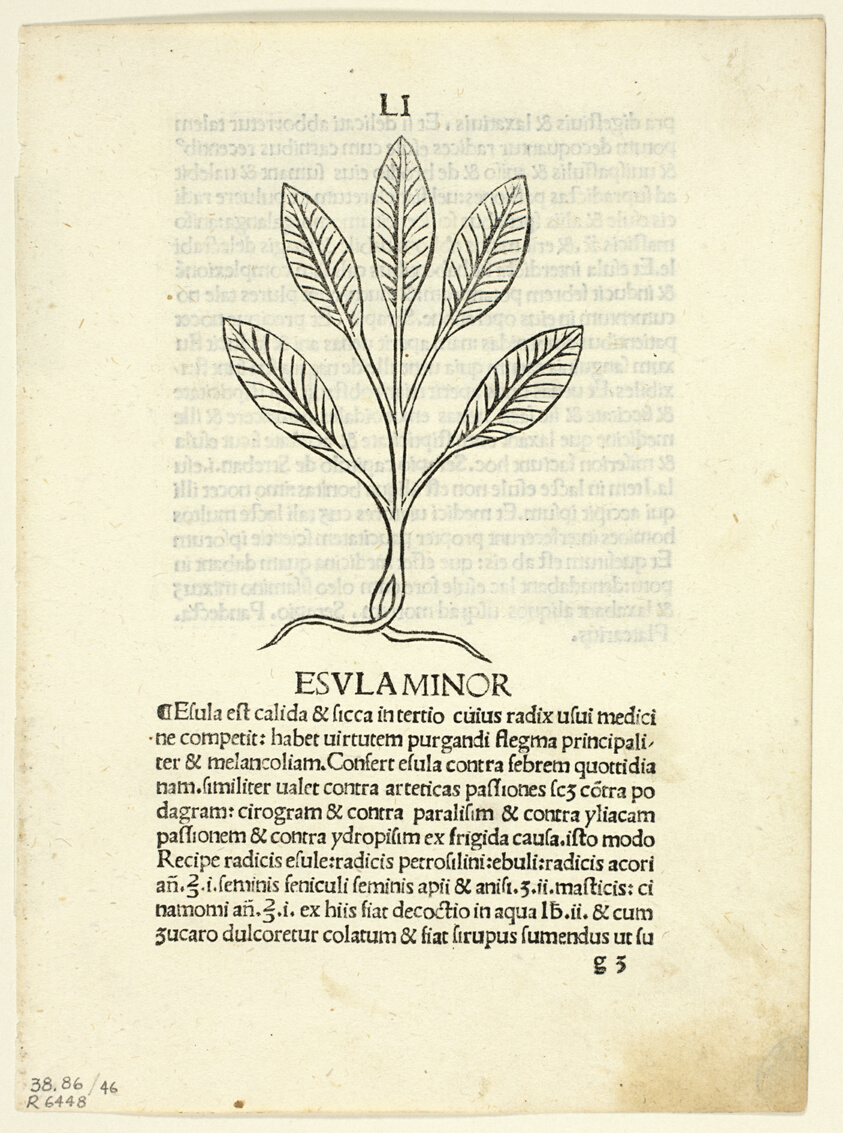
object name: Print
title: Esula Minor from Herbarium, Plate 46 from Woodcuts from Books of the 15th Century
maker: Unknown Artist (Vicenza, late 15th century); printed and published by Leonardus Achates (Swiss, active Italy, 1472-1491); original text by Arnaldus de Villa Nova (Spanish, c. 1240–1311); portfolio text by Wilhelm Ludwig Schreiber (German, 1855–1932)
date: 1491, portfolio assembled 1929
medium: Woodcut in black, and letterpress in black (recto and verso), on cream laid paper, tipped onto cream wove paper mat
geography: Italy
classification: woodcut; print; prints and drawing